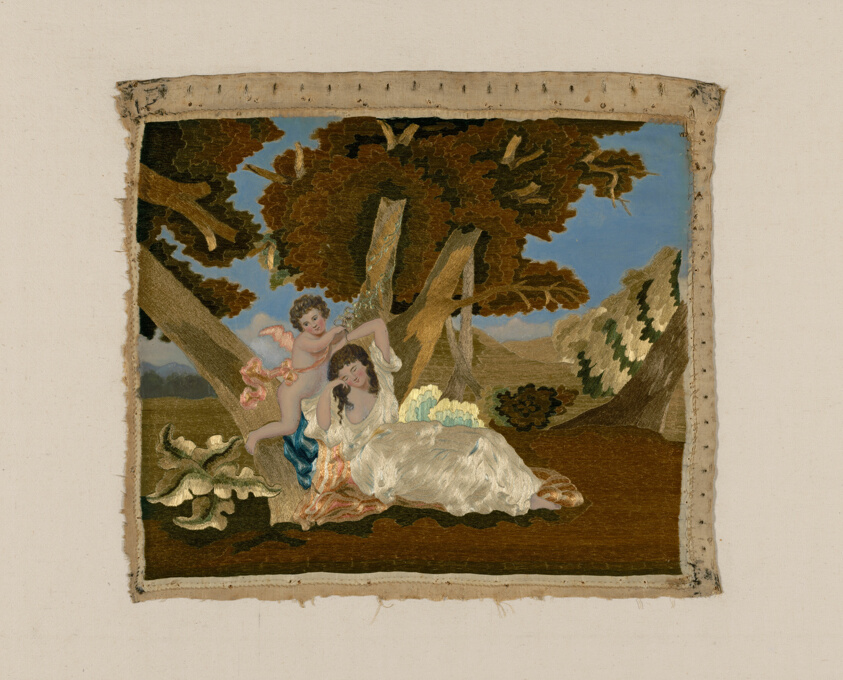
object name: Textile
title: Cupid and Psyche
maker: United States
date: 1801/25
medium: Silk, plain weave; underlaid with linen, plain weave; embroidered with silk in split, stem, and surface satin stitches; painted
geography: United States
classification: textile; needlework (visual works)